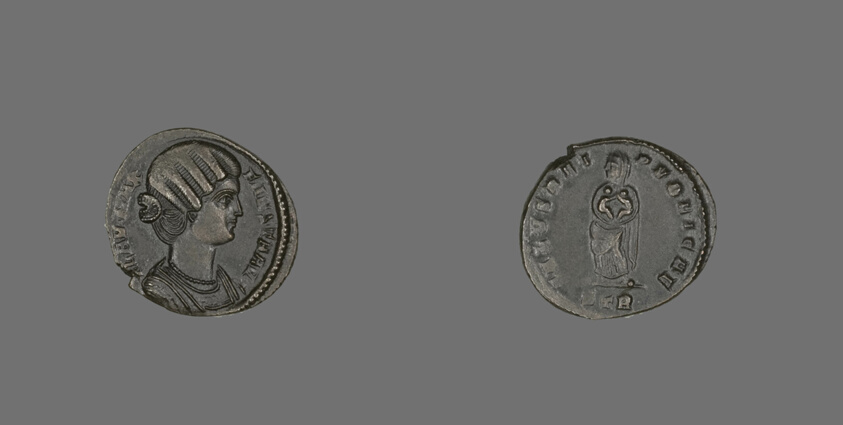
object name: Coin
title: Coin Portraying Empress Fausta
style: roman (ancient, style or period)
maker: Roman, minted in Trier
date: 324-325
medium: Bronze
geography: Trier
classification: coin; ancient art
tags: portrait